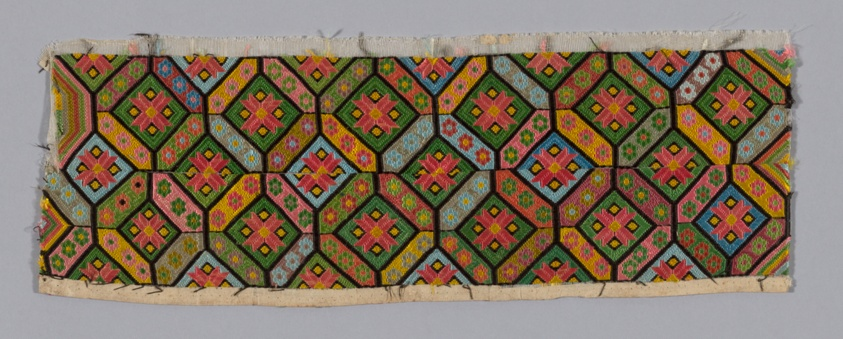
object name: Textile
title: Panel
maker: Han-Chinese (China)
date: Qing dynasty (1644–1911), 1875/1900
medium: Forty-four pairs and eight odd pieces of embroidered sleeve, ankle bands, etc. on gauze.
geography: China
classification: embroidery; textile